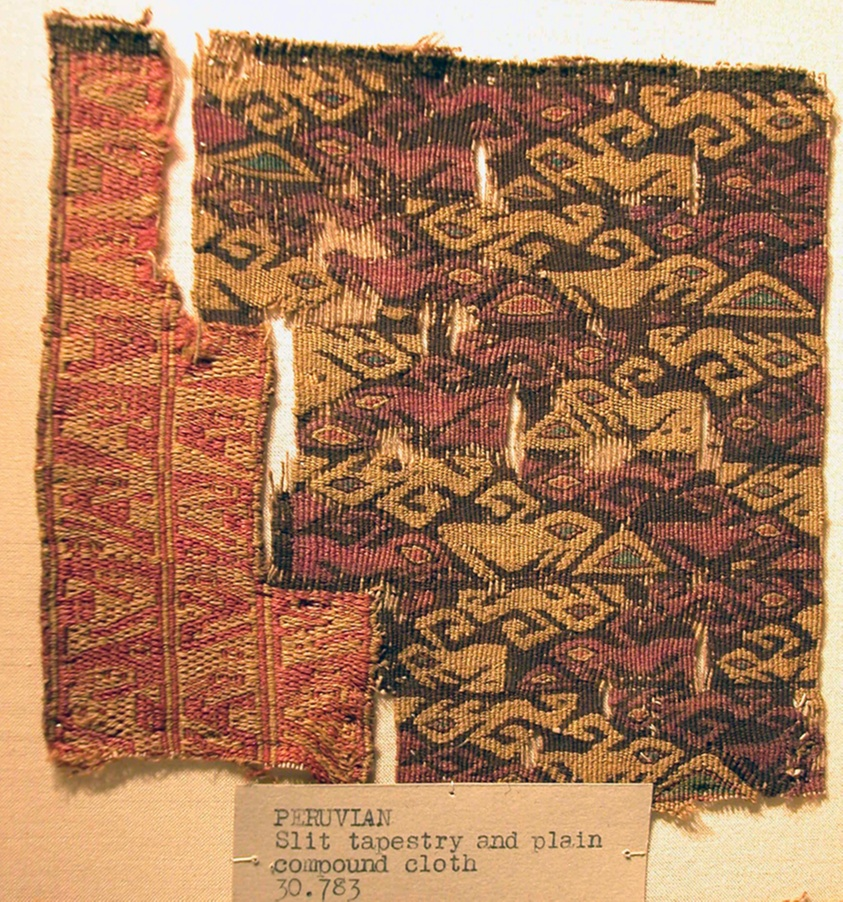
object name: Textile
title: Fragment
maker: Probably north or central coast, Peru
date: A.D. 1000/1476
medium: Slit tapestry and plain compound cloth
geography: Peru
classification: textile; weaving